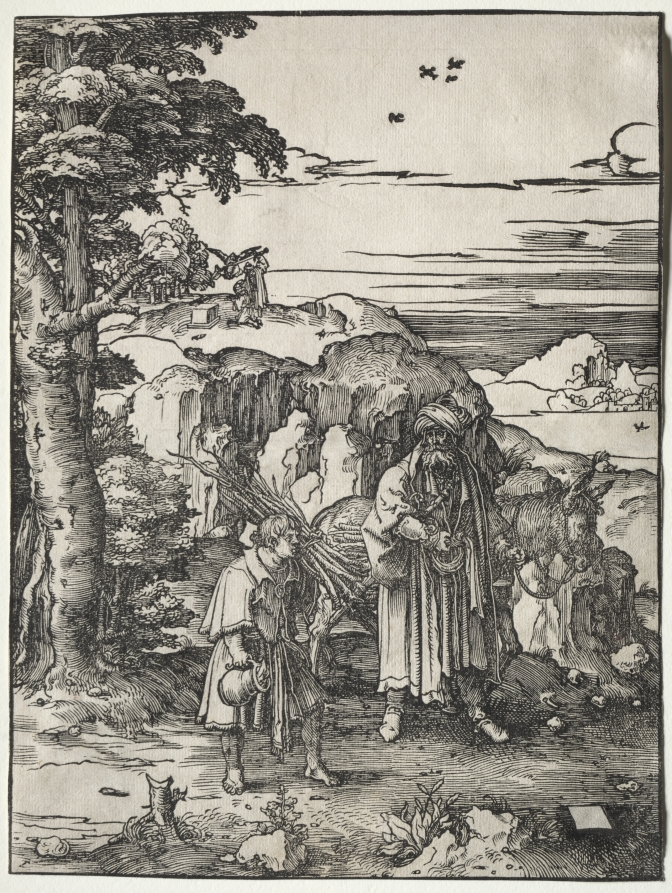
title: Abraham Going to Sacrifice Isaac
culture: Netherlands, 16th century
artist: Lucas van Leyden (Netherlandish, 1494–about 1533)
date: 1517–19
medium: woodcut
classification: Print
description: Abraham Going to Sacrifice Isaac was the culmination of Van Leyden's achievement in woodcut. He harmoniously balanced relatively straight, short, uniform hatching strokes, creating areas of tone, with vigorous, yet restrained lines for contours and descriptive detail. Spatial clarity and pictorial richness emphasize the artist's poignant approach to the subject. Because many believe Isaac's carrying of the wood to his own sacrifice prefigures Christ's bearing of the cross to Calvary, the actual journey of Abraham and Isaac becomes as significant a subject as the moment when Abraham prepares to sacrifice his son.